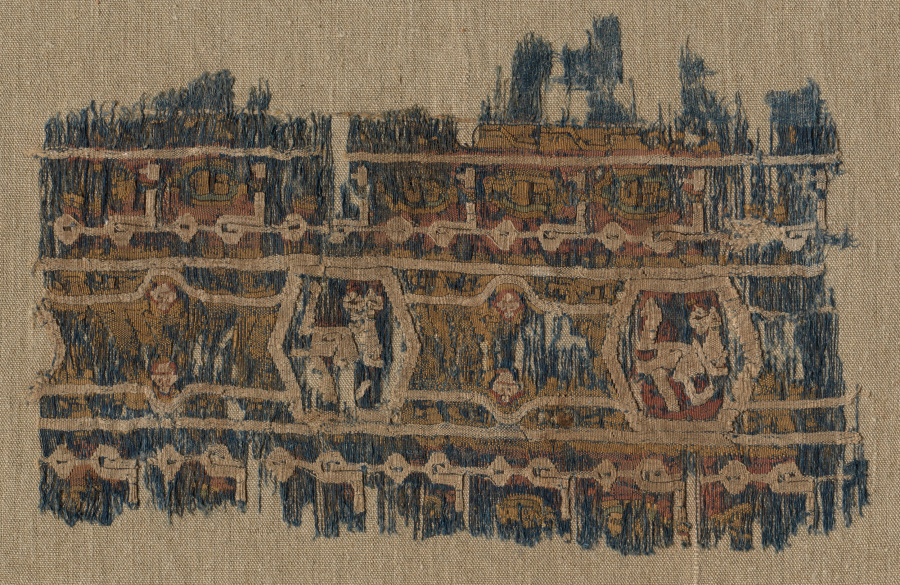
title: Fragment of a Tiraz-Style Textile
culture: Egypt, Fatimid period, Caliphate of al-Mustansir, 1000s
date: 1081–94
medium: tabby ground with inwoven tapestry ornament; linen and silk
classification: Textile